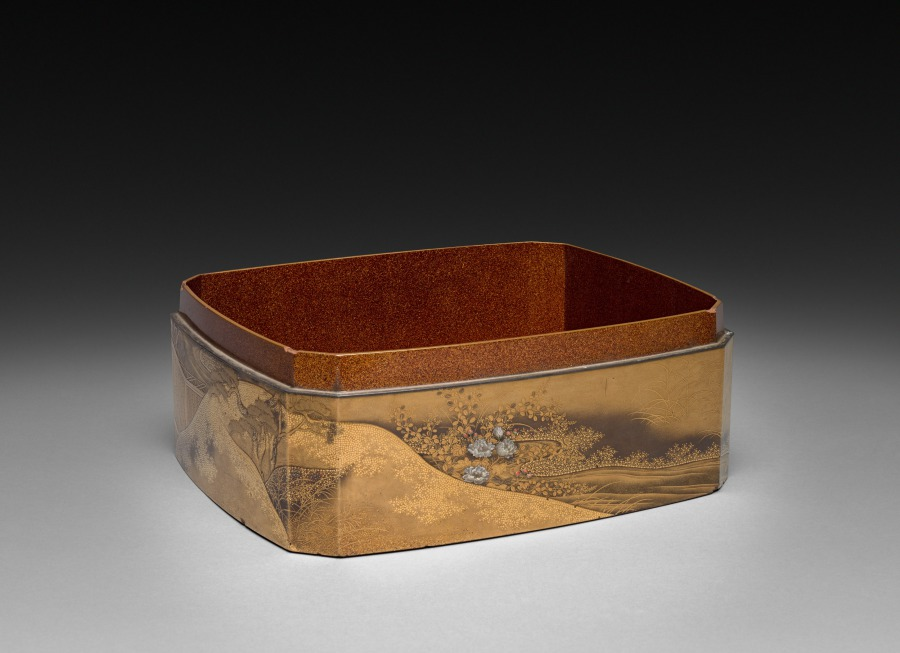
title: Box with Landscape (base)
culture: Japan, Edo period (1615–1868) to Meiji period (1868–1912)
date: 1800s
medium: lacquer with sprinkled gold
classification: Lacquer